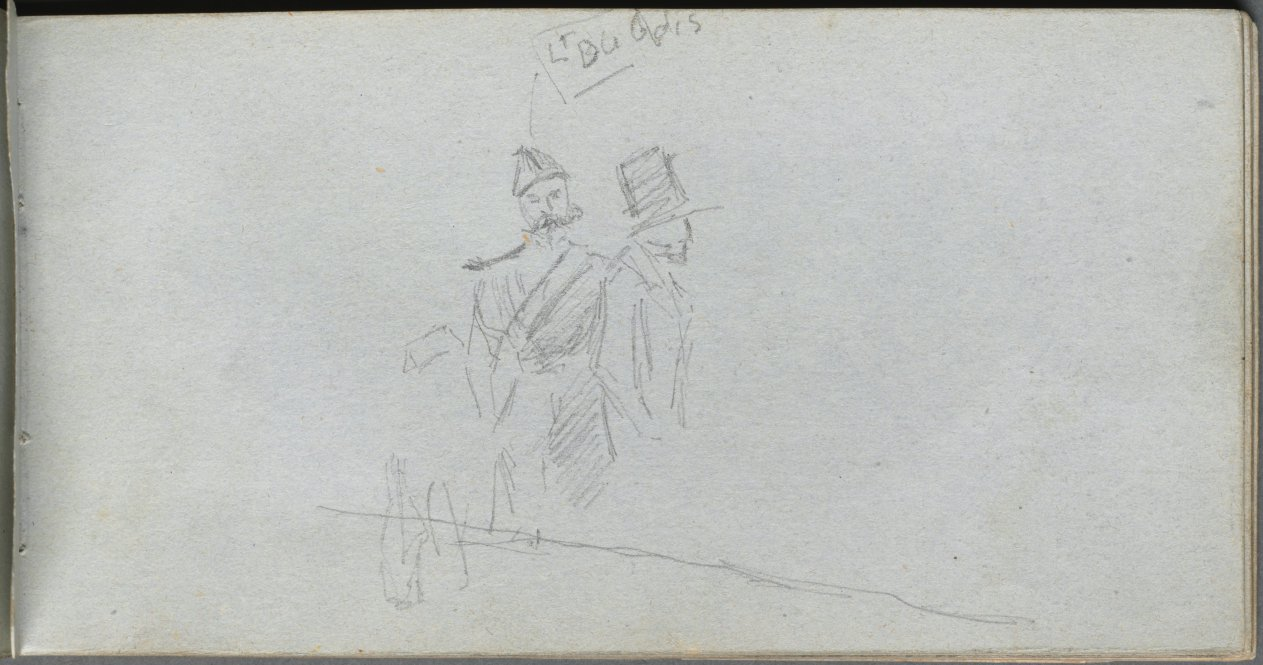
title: Sketchbook, page 38: Study of a Solider and Figure in Top Hat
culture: France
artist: Ernest Meissonier (French, 1815–1891)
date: c. 1860s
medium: graphite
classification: Bound Volume